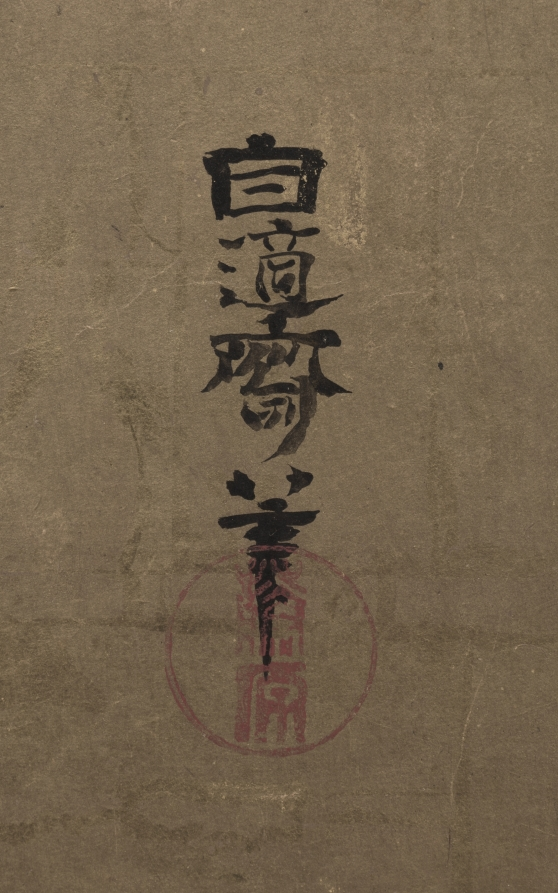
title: Winter Scene with Plum Trees and Pheasants (Birds Left)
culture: Japan, Edo period (1615–1868)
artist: Kano Naonobu (Japanese, 1607–1650)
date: early 1600s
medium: pair of six-fold screens, mineral pigments and gold leaf on paper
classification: Painting